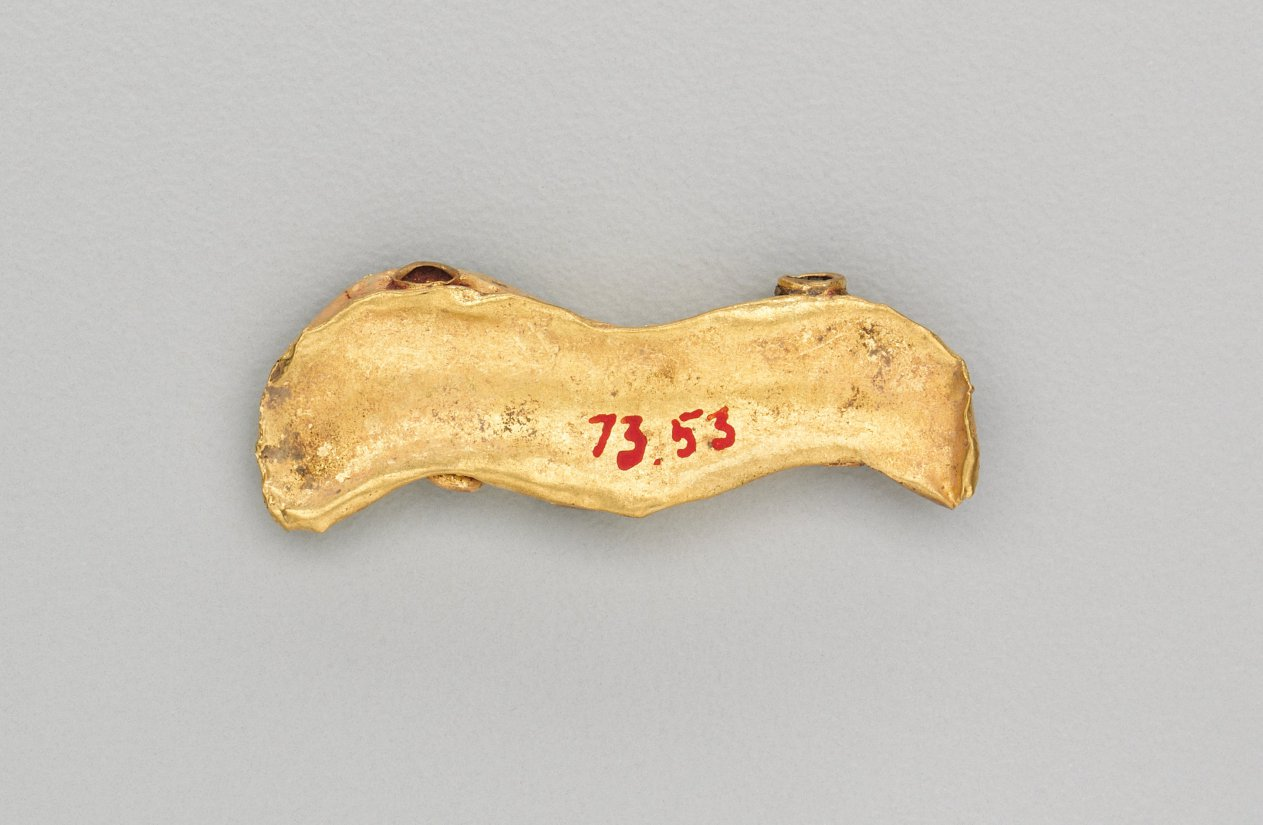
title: Set of Pendants Ending in a Bull's Head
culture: India, Shunga period (185–78 BCE)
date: 185–72 BCE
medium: gold repoussé with granulation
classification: Jewelry